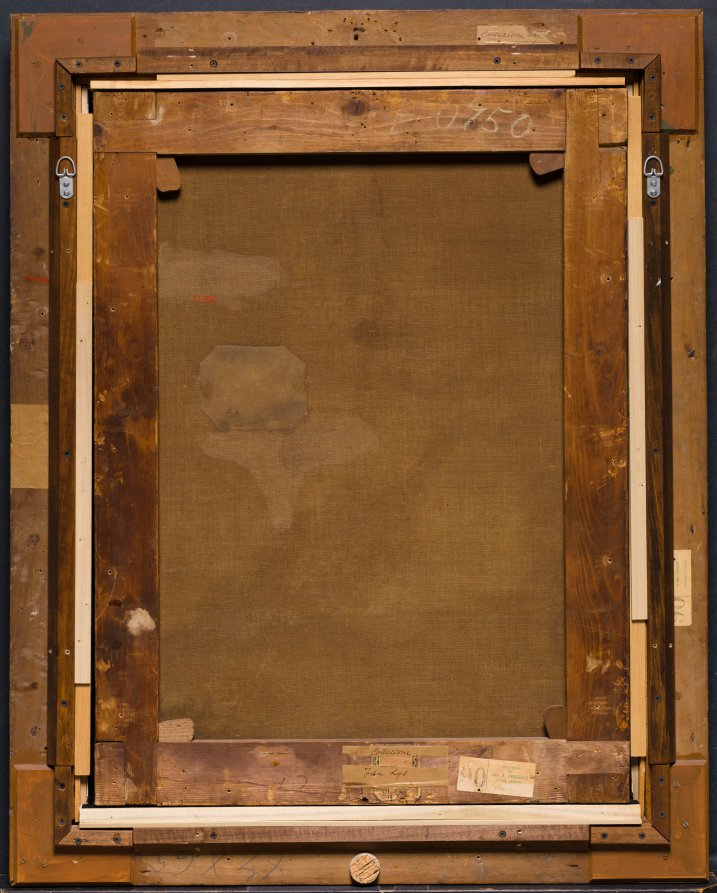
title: Cupid (Amor)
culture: Germany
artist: Johann Liss (German, c. 1597–1631)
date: c. 1630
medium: oil on canvas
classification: Painting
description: Johann Liss studied in Holland and Antwerp, and later (about 1620) traveled to Rome and Venice. His painting of Cupid—also known as Amor, the god of love—displays rich colors and fluid brushwork that were influenced by past Venetian masters (Titian, Tintoretto, or Veronese), while the deep contrasts of light and shadow reveal a stylistic debt to Caravaggio. The directness of Cupid’s gaze and the concentrated energy of his pose create a strong connection with the viewer.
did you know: Liss skillfully combined Dutch, Flemish, and Italian styles to create his own distinct manner.